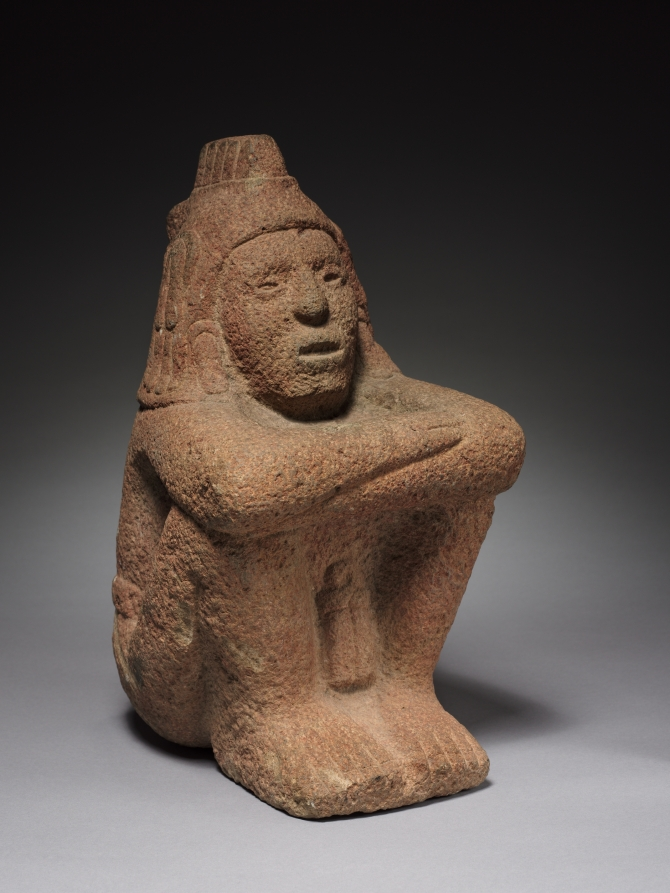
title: Seated Deity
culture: Mexico, Aztec, Valley of Mexico near Teotihuacan, Macuilxochitl (?), 14th-16th century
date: 1350–1519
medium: gray volcanic stone with red pigment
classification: Sculpture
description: The crested headdress with tassels suggests that this youthful, seated male is Macuilxochitl (Five Flower), an Aztec supernatural patron of many forms of pleasure, among them music, dance, feasting, games, and sex. His cult was popular among common people, and this effigy probably was created for use in a small neighborhood temple. The stone surface could have been plastered and then brightly painted.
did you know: The Aztecs associated the number 5 with excess: there were five gods of pleasure, one named “Five Flower.”